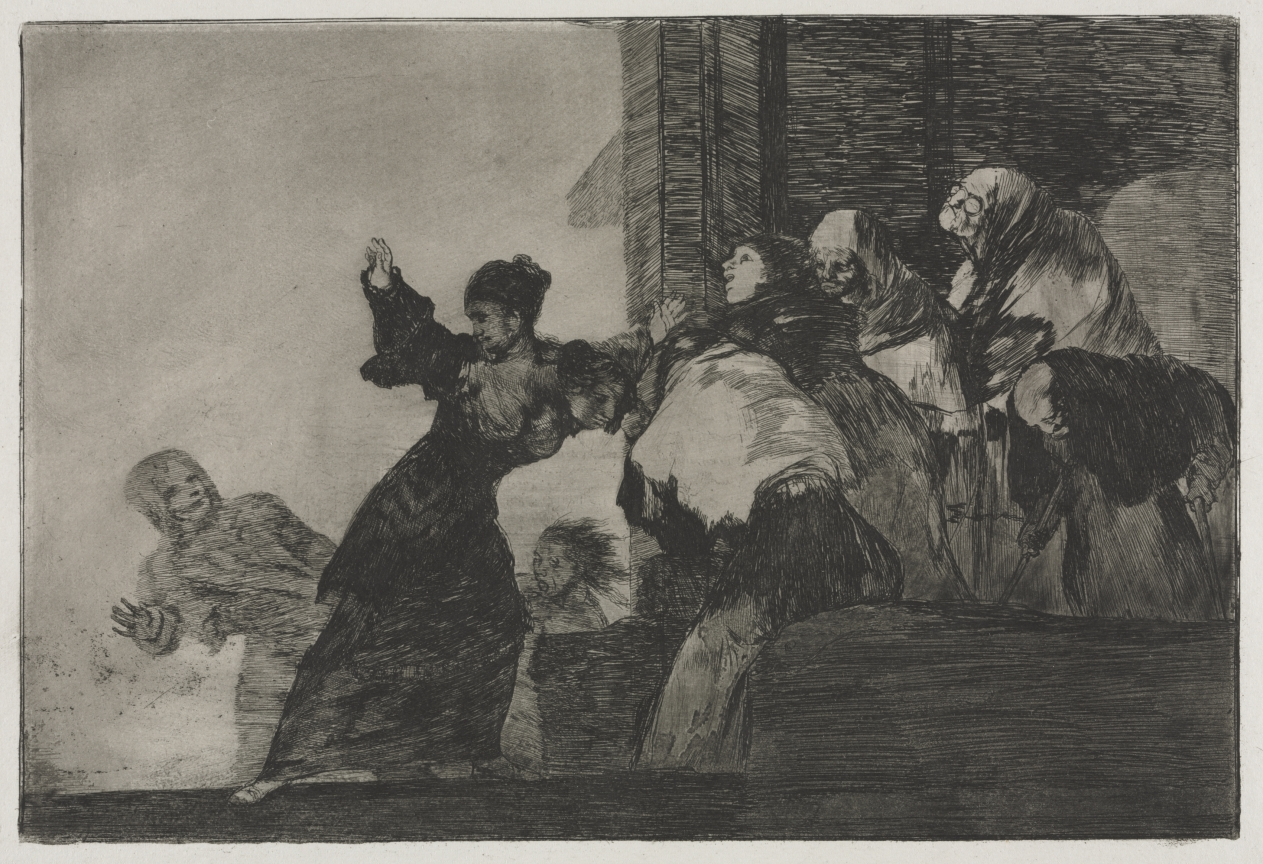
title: The Proverbs: Poor Folly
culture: Spain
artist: Francisco de Goya (Spanish, 1746–1828)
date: 1864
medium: etching and aquatint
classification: Print